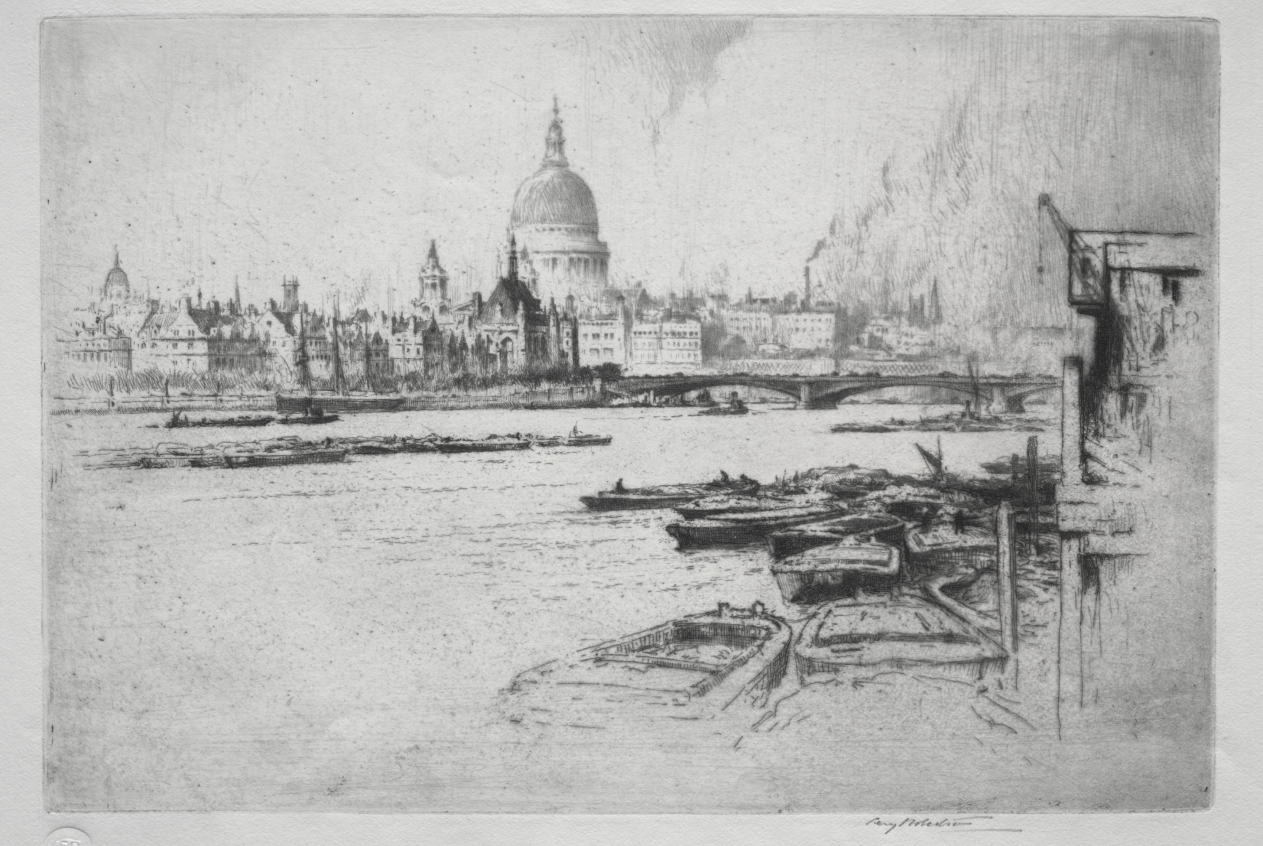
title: St. Paul's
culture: England, 19th-20th century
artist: Percy Robertson (British, 1868–1934)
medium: etching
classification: Print